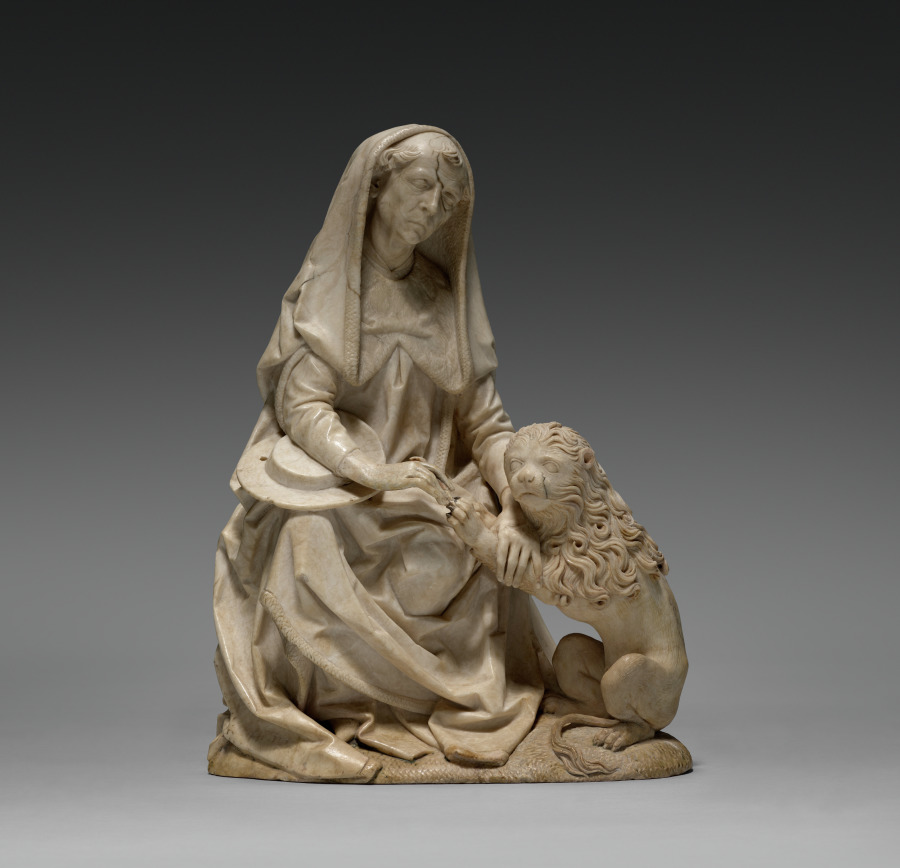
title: Saint Jerome and the Lion (From the former Church of St. Peter in Erfurt)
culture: Germany, Würzburg, late 15th Century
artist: Tilman Riemenschneider (German, active Würzburg, c. 1460–1531)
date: c. 1495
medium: alabaster, traces of polychromy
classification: Sculpture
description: According to legend, Saint Jerome (347–420 bce) lived in the desert, where he removed a thorn from an injured lion. Jerome is venerated in the Catholic Church as a Church Father, an important early author of Christianity. Here, he wears cardinal’s clothing from around 1500. Tilman Riemenschneider focused on Jerome’s relationship with the lion, creating empathy for the wounded animal. The delicacy of the depiction, which may have been partially painted to add highlights, is typical of alabaster, as is its fine polishing. The cord of the cardinal’s hat, missing today, may have been supplemented from another material.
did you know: In the story Saint Jerome encounters a fearsome lion, here depicted as diminutive, gentle, and submissive.